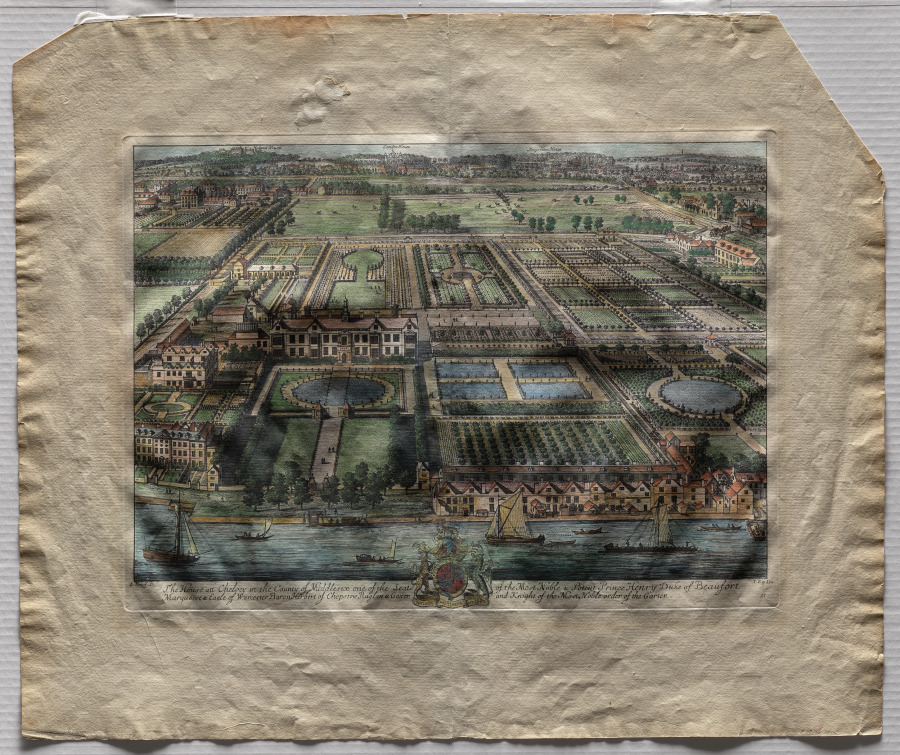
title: Beaufort House, Chelsea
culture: Netherlands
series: Britannia Illustrata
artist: Johannes Kip (Dutch, 1653–1722)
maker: after Leendert Knijff (Dutch, 1650–1721)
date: 1707–9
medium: etching and engraving, hand colored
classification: Print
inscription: In pencil, recto, lower left: "Double page illustration In/Old London [illegible] by Gladys Taylor"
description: This detailed view of Beaufort House in Chelsea portrays the gabled house, built in 1521, and its extensive formal gardens. Part of a large folio publication of the principal seats of the nobility in England, the Britannia Illustrata, it portrays a structure that was once the home of Sir Thomas More and that was demolished in 1740. The two Dutch artists who collaborated on this and the other topographical views in the volume, both resident in England, were exacting in their depictions of the architecture and gardens, providing valuable insight to the land and buildings of the time.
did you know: The house and gardens portrayed in this hand-colored engraving were destroyed in 1740.